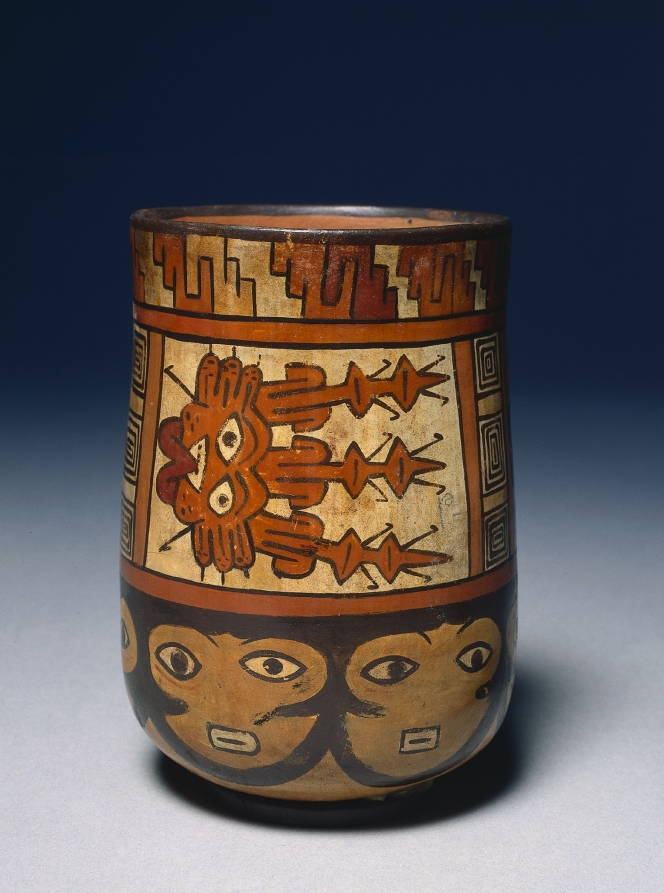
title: Vessel with Female Faces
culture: Peru, South Coast, Nasca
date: 100 BCE–700 CE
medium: earthenware with colored slips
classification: Ceramic